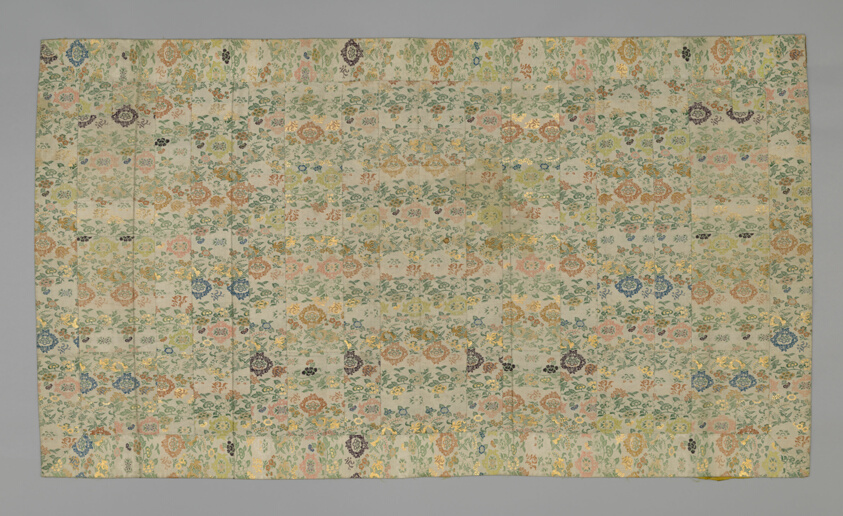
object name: Textile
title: Kesa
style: meiji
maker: Japan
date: Meiji period (1868–1912), 1870/90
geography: Japan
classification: textile; weaving; costume; liturgical - buddhist